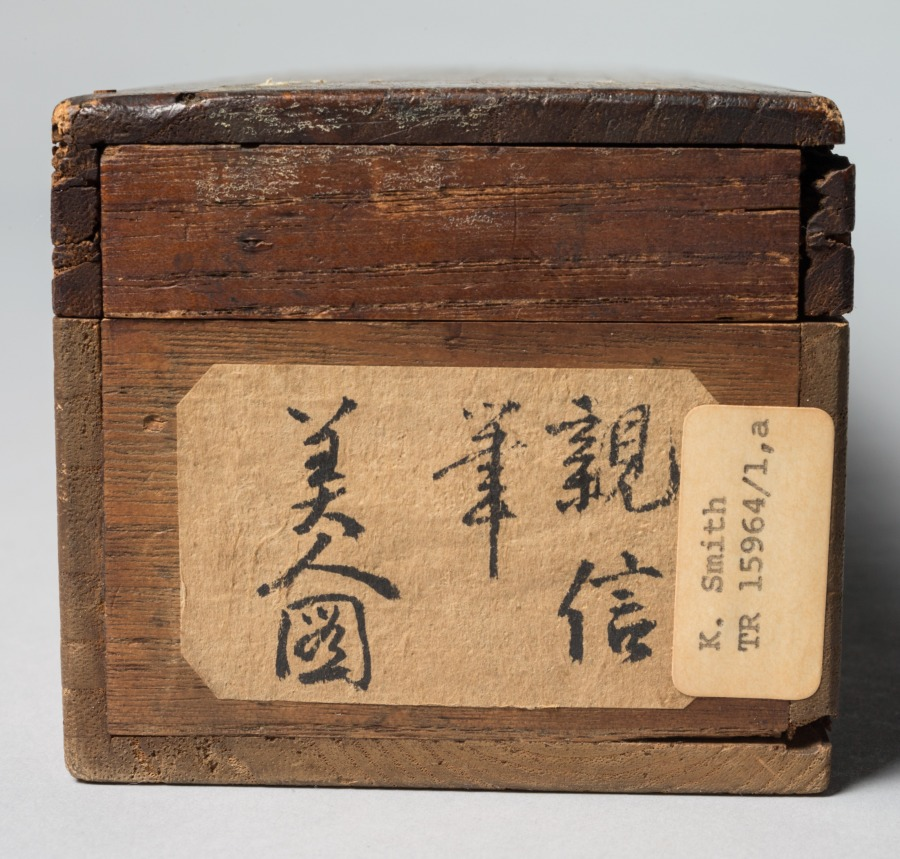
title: Courtesan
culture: Japan, Edo period (1615–1868)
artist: Matsuno Chikanobu (Japanese, active 1716–35)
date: 1716–35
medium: hanging scroll; ink and color on paper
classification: Painting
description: A glamorous courtesan sports an outer robe decorated with large roundels featuring plant motifs including iris and bush clover. Little is known about the life and artistic training of the painter Matsuno Chikanobu, an ukiyo-e artist who painted in a style strongly reminiscent of that of the Kaigetsudō studio. Many of his known paintings are on silk, and executed with high quality pigments, indicating that his primary clientele were wealthy individuals.